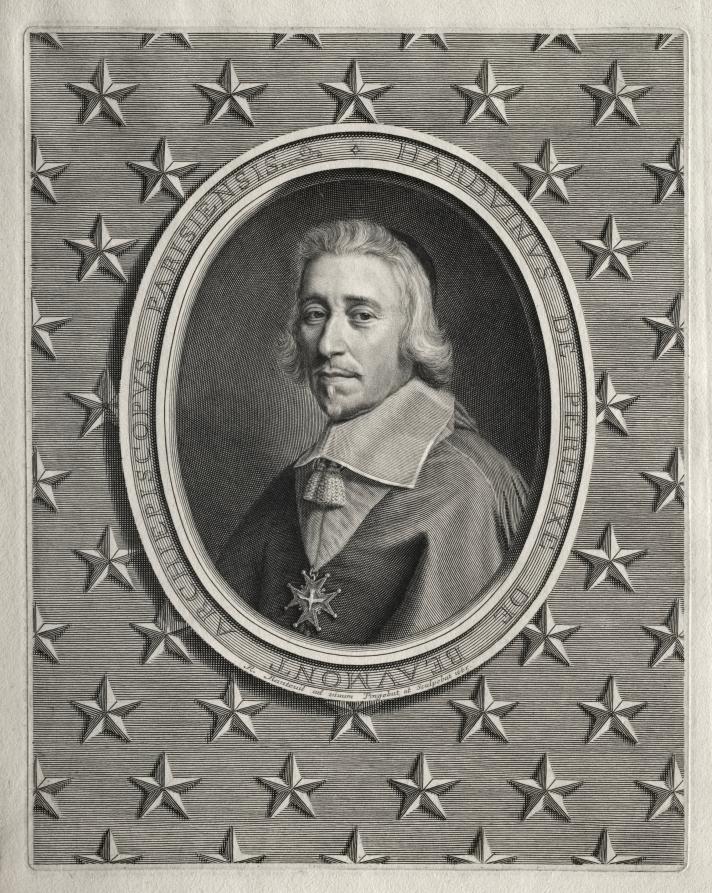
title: Hardouin de Péréfixe de Beaumont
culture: France, 17th century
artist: Robert Nanteuil (French, 1623–1678)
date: 1665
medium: engraving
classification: Print